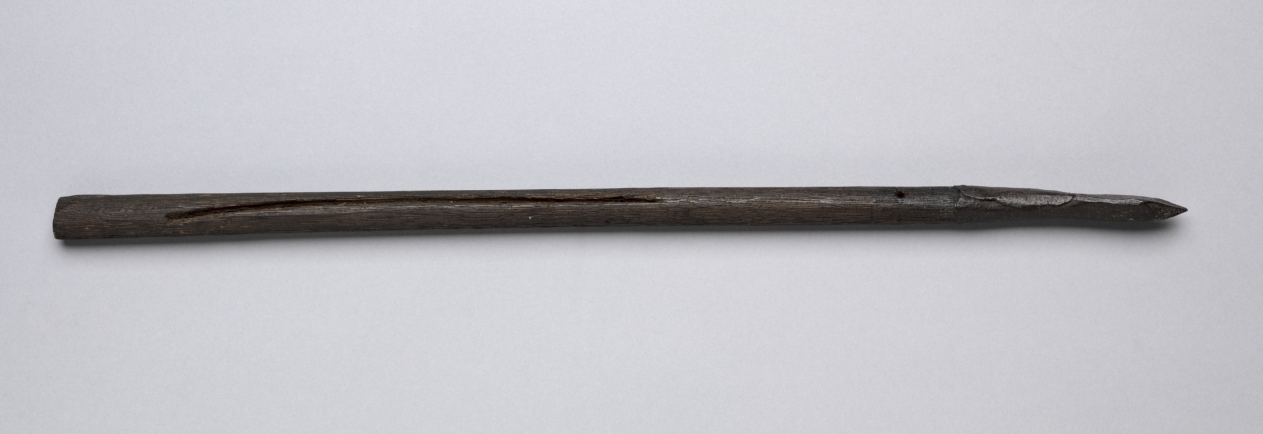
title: Crossbow Bolt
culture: Germany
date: 1500s-1600s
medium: wood, leather, steel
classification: Arms and Armor